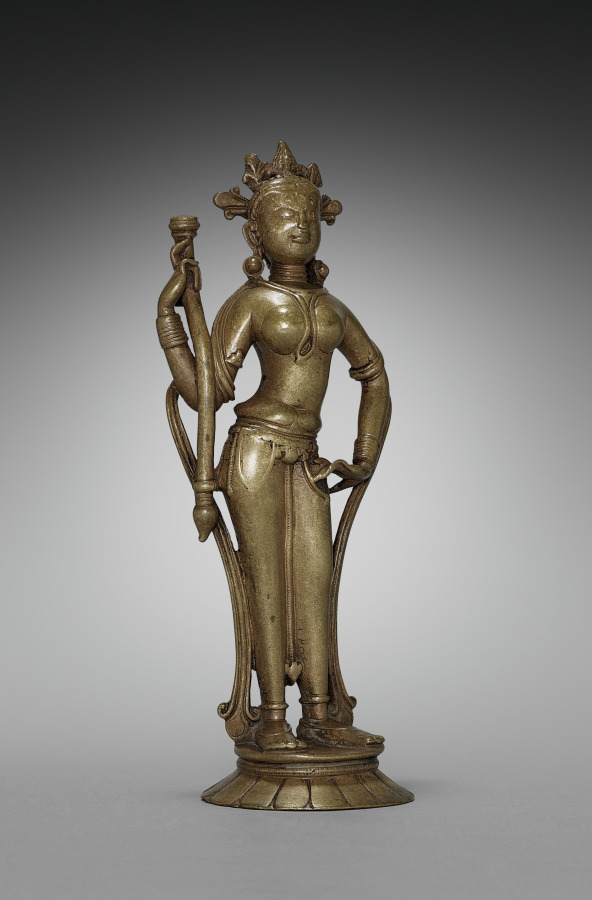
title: Standing Devi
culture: India, Ladakh, 12th century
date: 1100s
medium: brass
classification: Sculpture